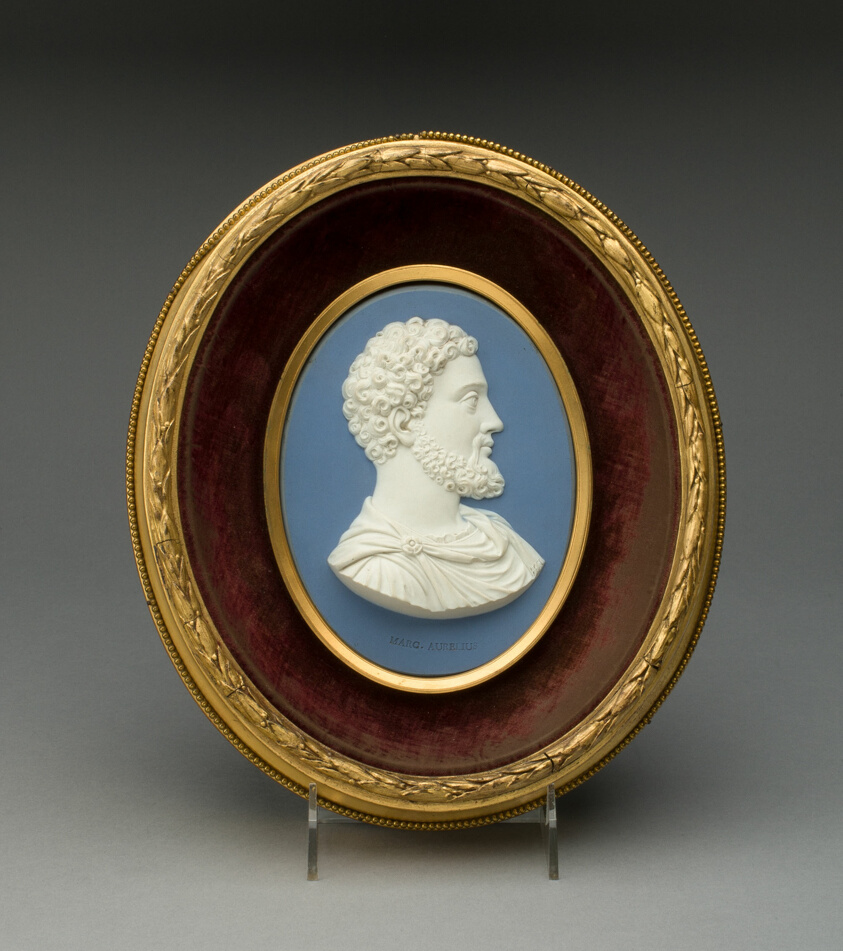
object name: Ceramics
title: Plaque with Marcus Aurelius Antoninus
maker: Wedgwood Manufactory (England, founded 1759)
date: 1778/80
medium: Stoneware (jasperware)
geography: Burslem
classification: sculpture; stoneware; european decorative arts; ceramics